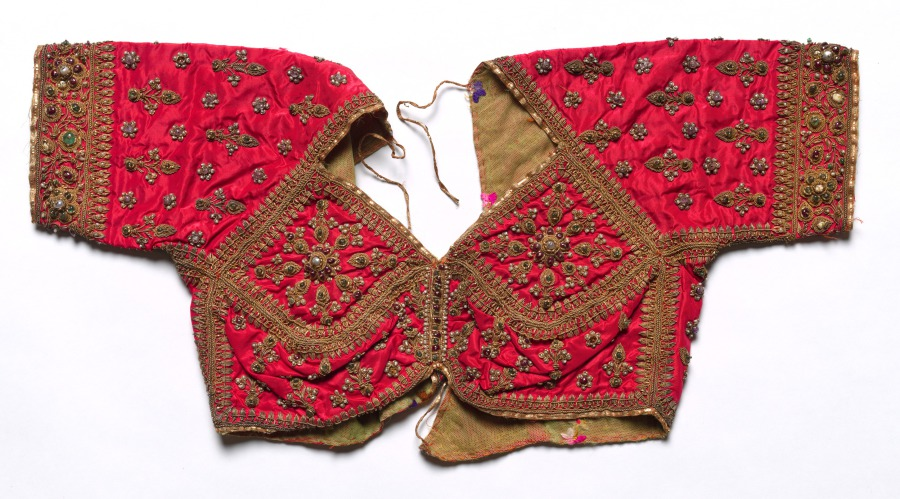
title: Child's Bodice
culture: India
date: early 1900s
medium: satin: embroidery decorated with gold thread, pearls, and glass beads(?)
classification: Garment